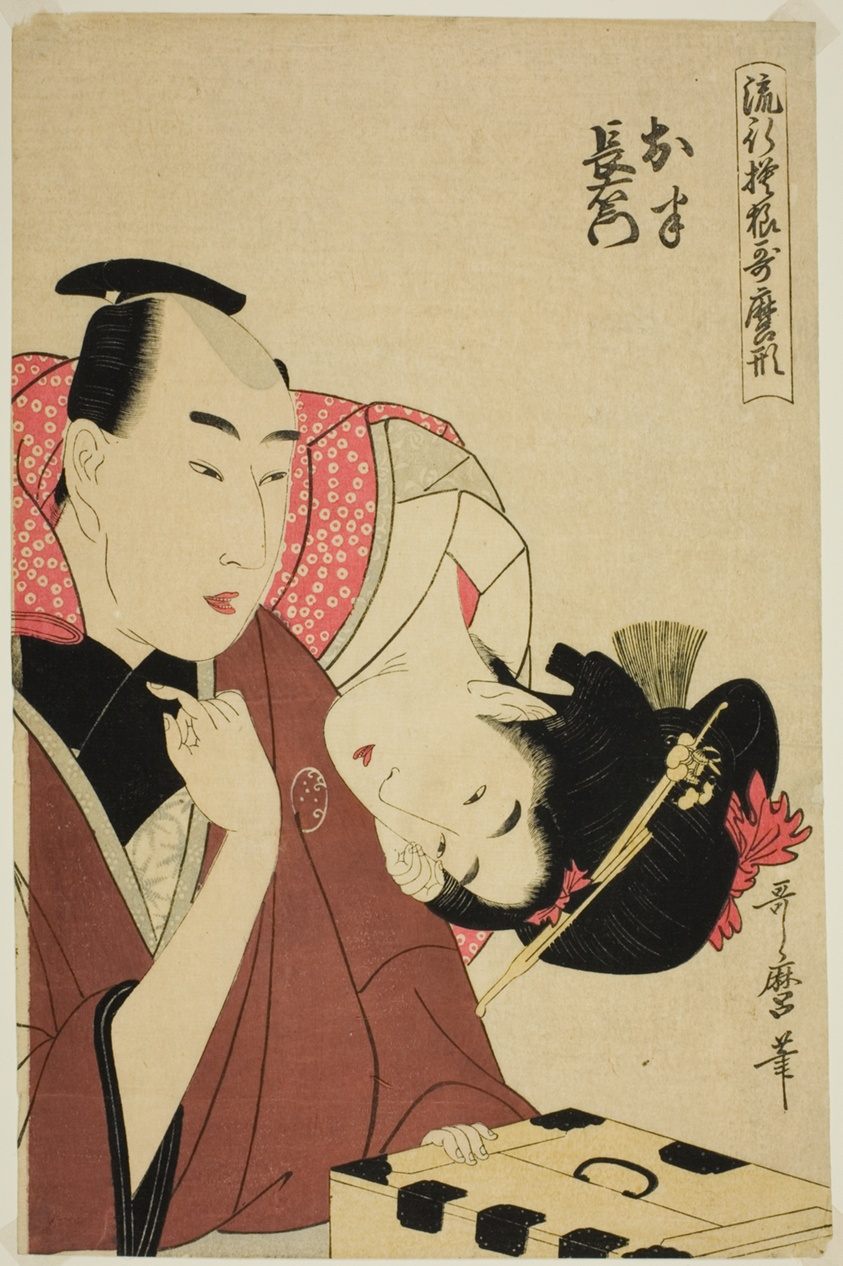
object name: Print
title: Ohan and Choemon, from the series "Fashonable Patterns in Utamaro Style (Ryuko moyo Utamaro-gata)"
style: Japanese (culture or style)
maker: Kitagawa Utamaro 喜多川 歌麿; Japanese, 1753 (?)-1806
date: c. 1798/99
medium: Color woodblock print; oban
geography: Japan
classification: woodblock print; print; asian art